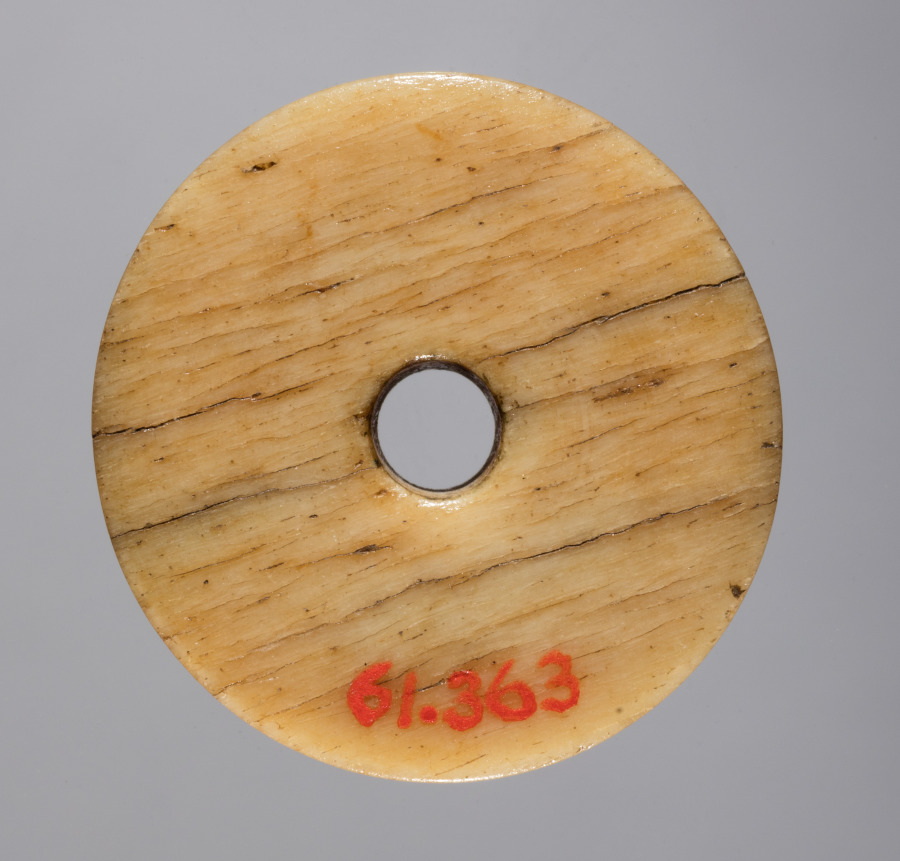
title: Spindle Whorl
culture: Iran, early Islamic period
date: 700s - 900s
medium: bone, incised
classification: Spindle Whorl